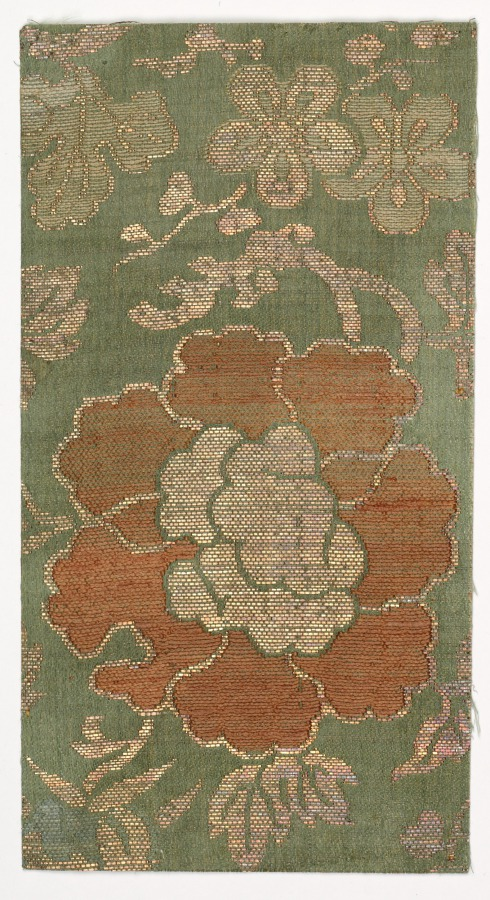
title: Textile Fragment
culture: Japan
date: 1800s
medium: silk, metallic thread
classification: Textile